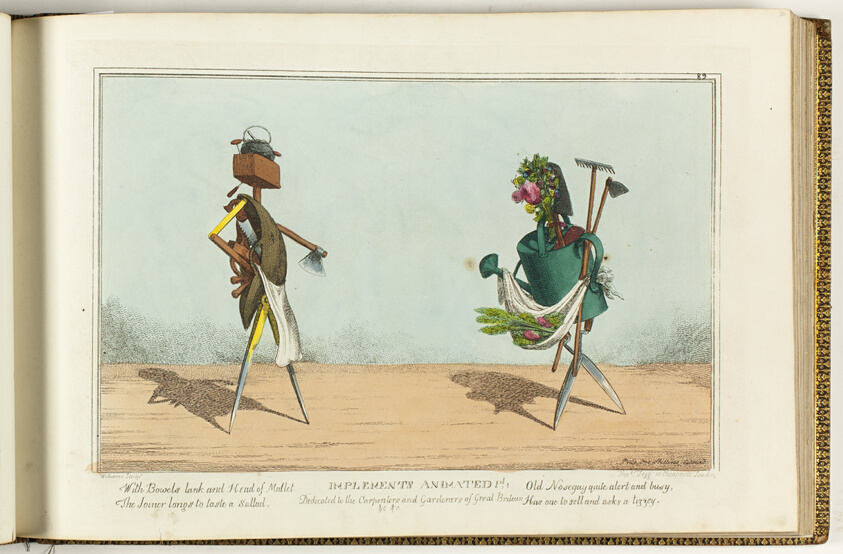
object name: Book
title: The Caricature Magazine, or Hudibrastic Mirror, Vol. I and II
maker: George Cruikshank (English, 1792-1878); Thomas Rowlandson (English, 1756-1827); Henry William Bunbury (English, 1750-1811); Piercy Roberts (English, 19th century); Charles Williams (English, active 1797-1830); after George Woodward (English, c.1760-1809); published by Thomas Tegg (English, 1776-1845)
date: 1819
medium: Book with hand-colored etchings in black on cream wove paper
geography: England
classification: aquatint; book; library/archives; prints and drawing